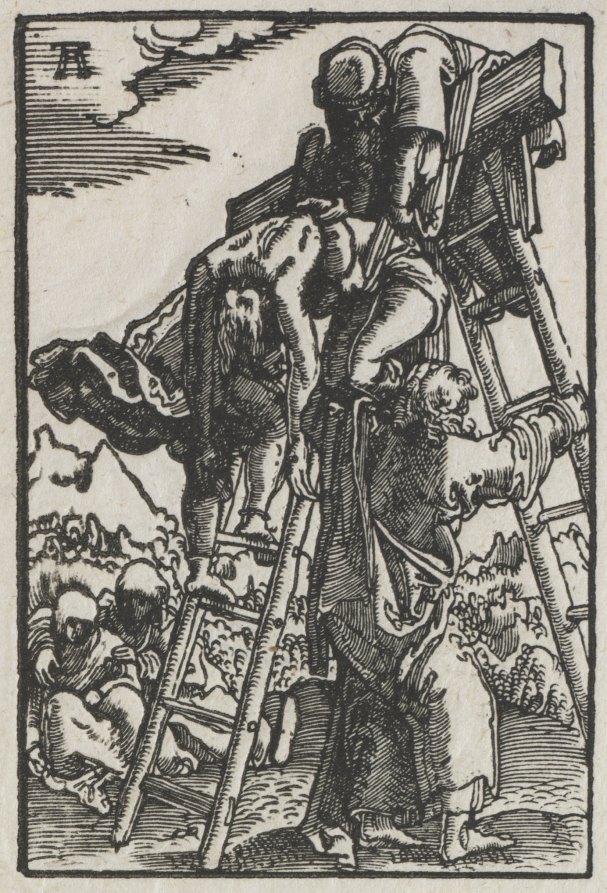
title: The Fall and Redemption of Man: Descent from the Cross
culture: Germany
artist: Albrecht Altdorfer (German, c. 1480–1538)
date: c. 1515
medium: woodcut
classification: Print